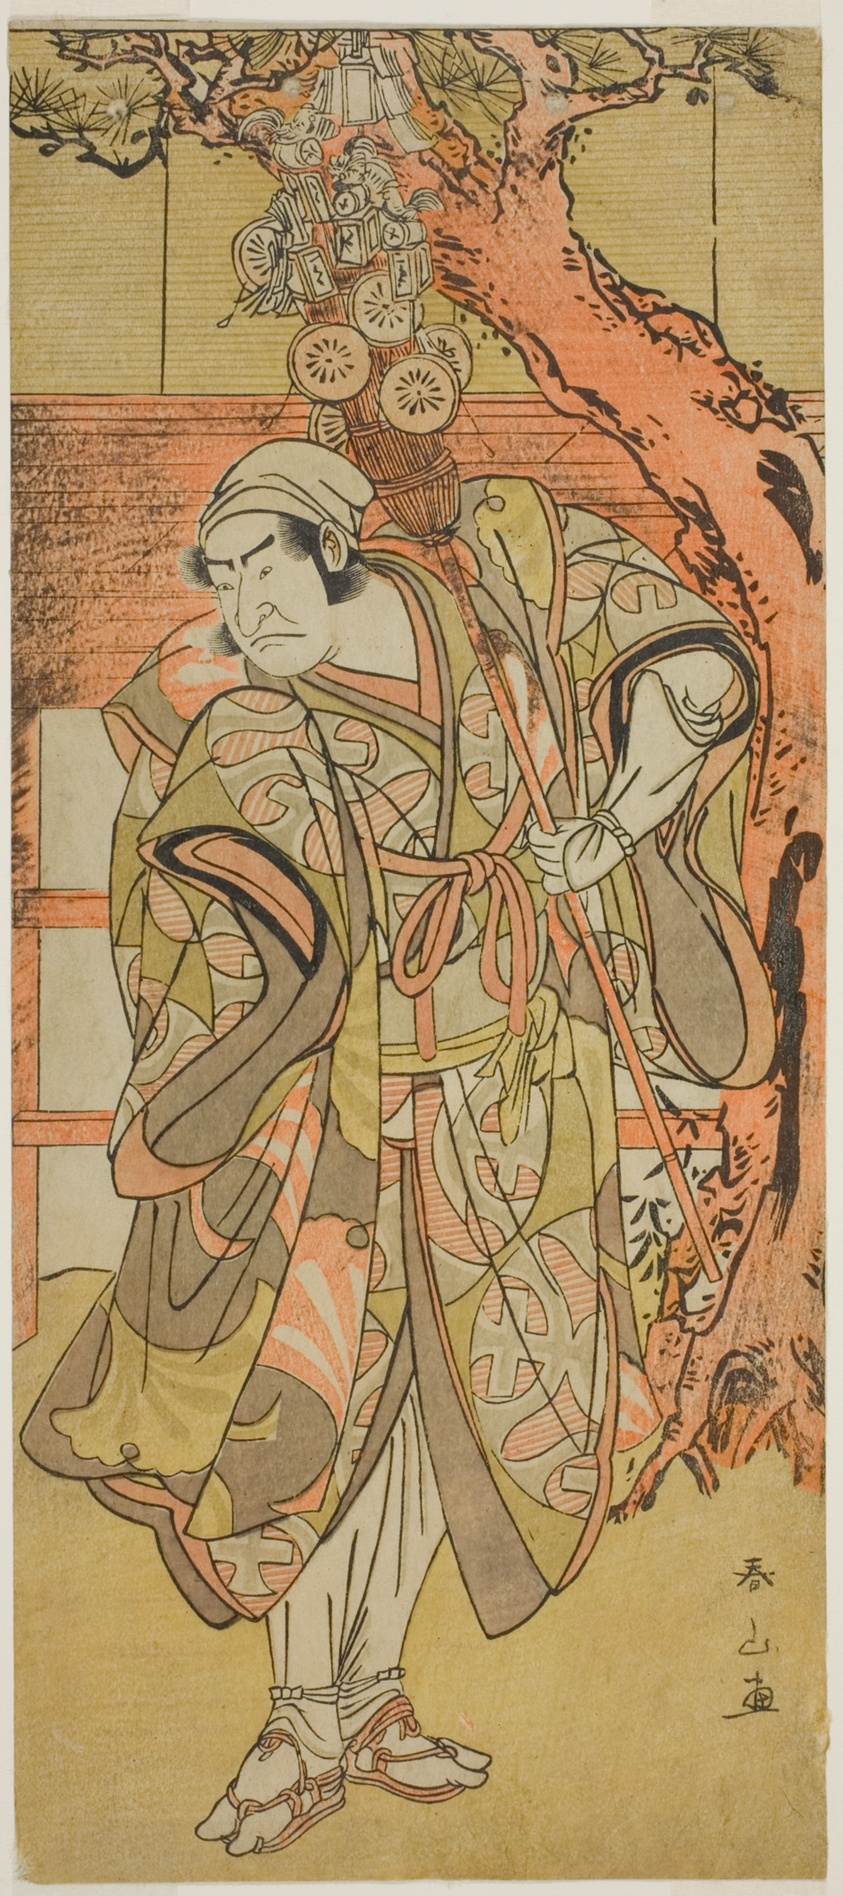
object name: Print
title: The Actor Nakamura Nakazo I as a peddler of toys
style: Japanese (culture or style)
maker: Katsukawa Shunzan (Japanese, active c. 1781-1801)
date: c. 1782/90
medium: Color woodblock print; hosoban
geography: Japan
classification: woodblock print; print; asian art